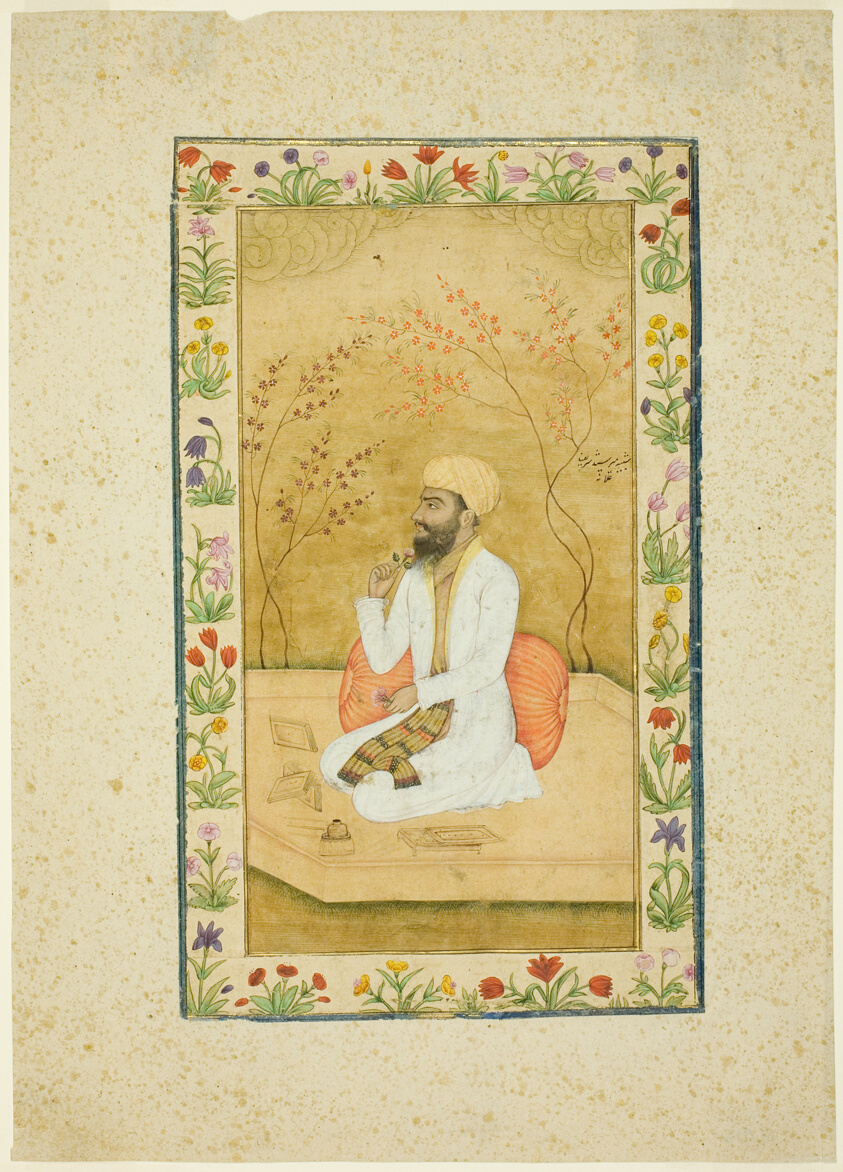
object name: Painting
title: Portrait of an Artist or Scholar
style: Islamic (culture or style)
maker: India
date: 17th century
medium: Watercolor, opaque watercolor, and gold on paper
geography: India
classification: miniature painting; painting; asian art